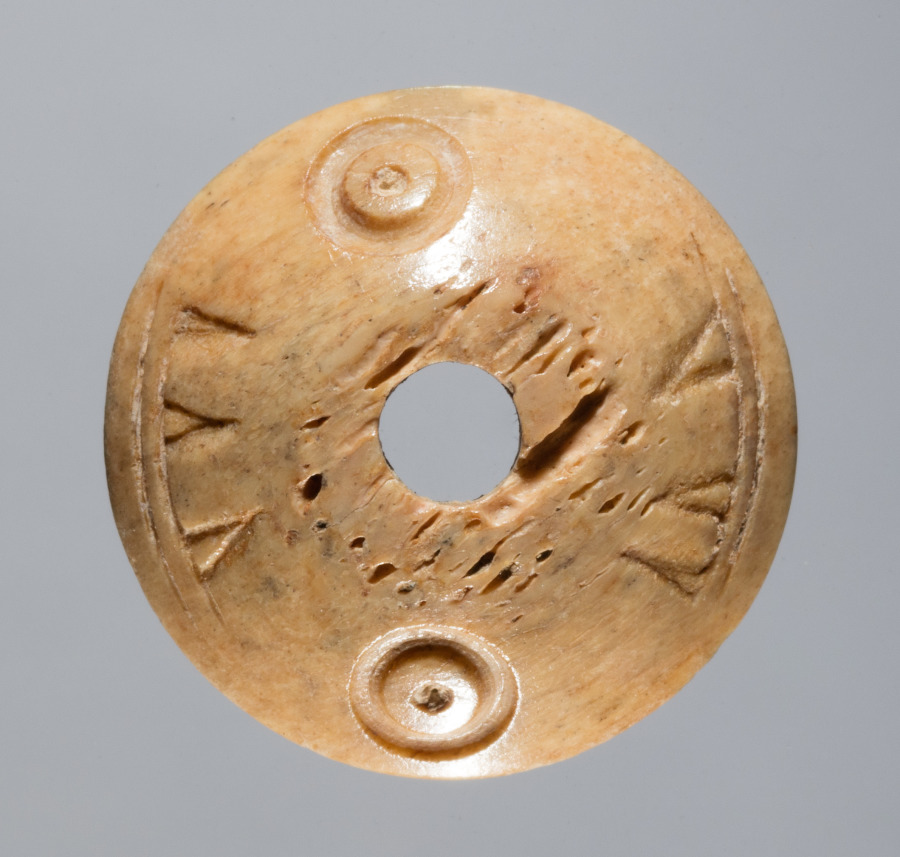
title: Spindle Whorl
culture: Iran, early Islamic period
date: 700s - 900s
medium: bone, incised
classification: Spindle Whorl